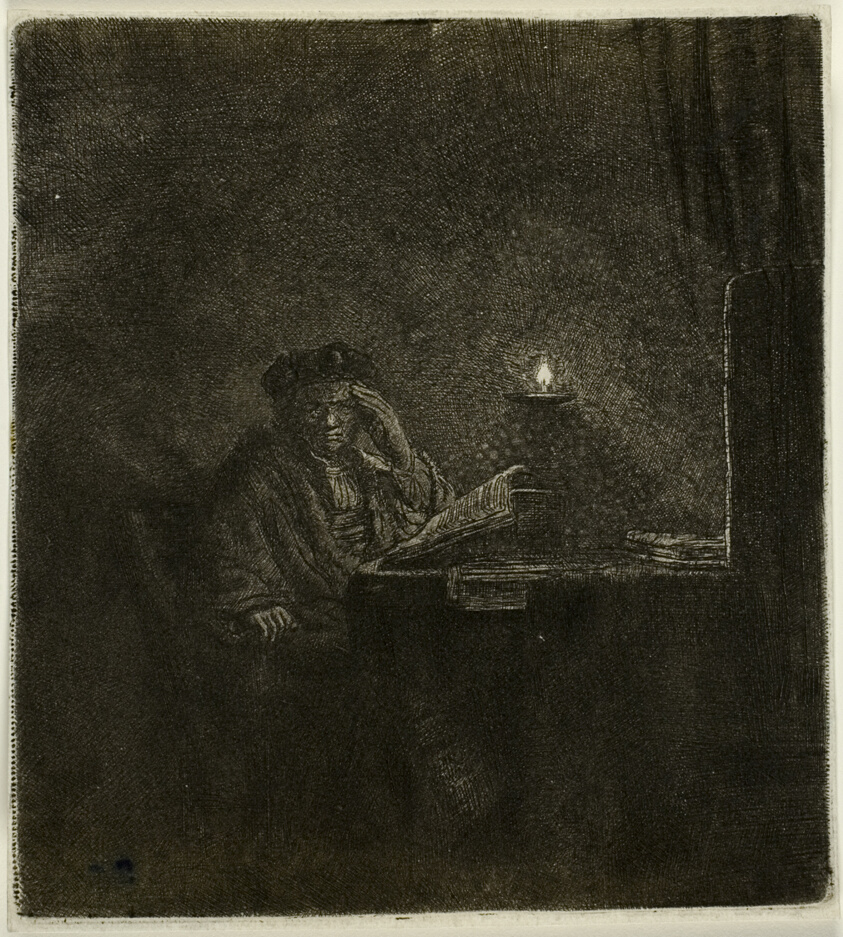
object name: Print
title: Student at a Table by Candlelight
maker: Rembrandt van Rijn (Dutch, 1606-1669)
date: c. 1642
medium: Etching on paper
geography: Holland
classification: etching; print; prints and drawing; paper